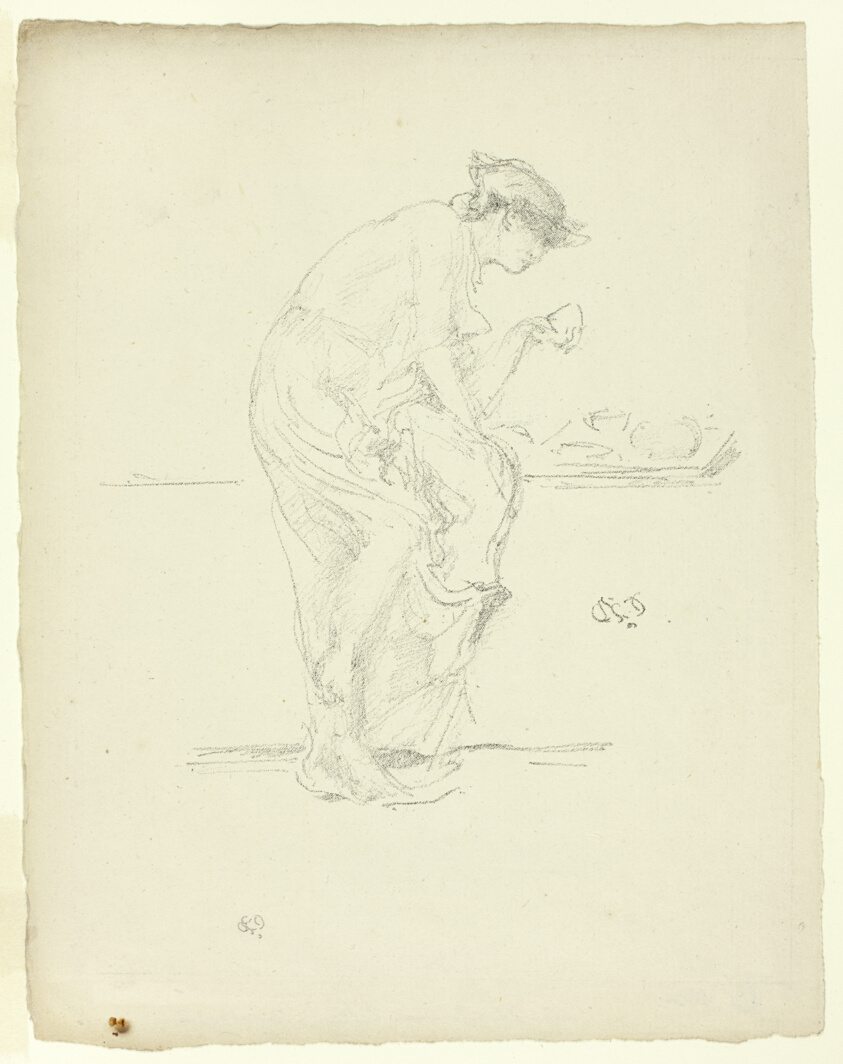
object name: Print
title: The Horoscope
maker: James McNeill Whistler (American, 1834-1903)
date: probably 1889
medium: Transfer lithograph in black on cream laid paper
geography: United States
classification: transfer lithograph; lithograph; print; prints and drawing; paper